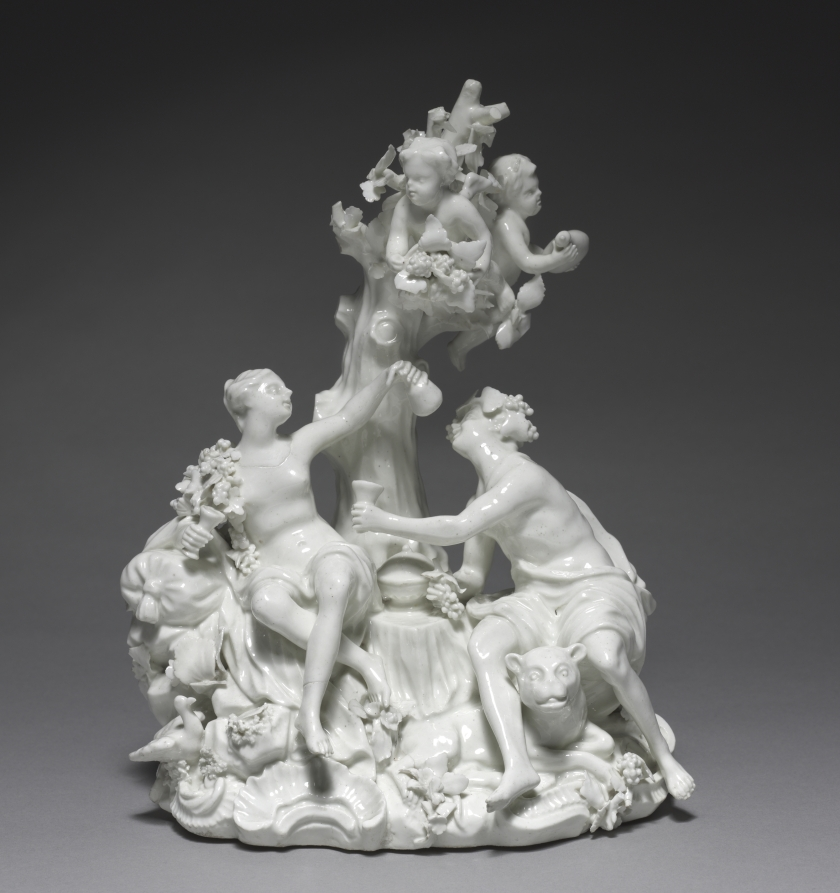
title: Figure Group of Bacchus and Ariadne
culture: Germany, mid-18th century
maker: Orléans Porcelain Factory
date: c. 1759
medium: soft-paste porcelain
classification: Ceramic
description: Porcelain figurines decorated the tabletops and living spaces of wealthy Europeans. Though seen in three-dimensions, their inspiration was often drawn from two-dimensional print sources. Swathed in flowers, this figure group depicts Cretan princess Ariadne pouring a drink for the Roman god of wine, Bacchus. Their pose and surrounding scenery was based on an etching by French engraver Jacques Philippe le Bas.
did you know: This object’s molding and all-white design is characteristic of blanc de chine, the French term referencing the highly prized porcelain produced in the southeastern Fujian province of Dehua, China, known for its pure color and high degree of translucence.